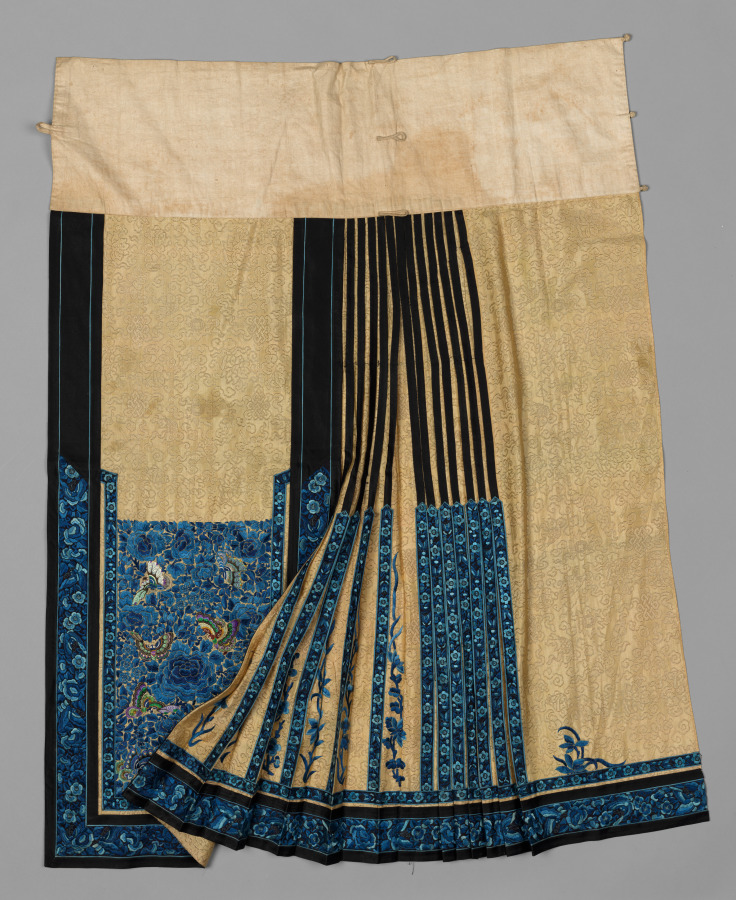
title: Skirt (Part 1)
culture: China, Qing dynasty (1644–1911)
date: late 1870s–early 1880s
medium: Silk, embroidery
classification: Garment